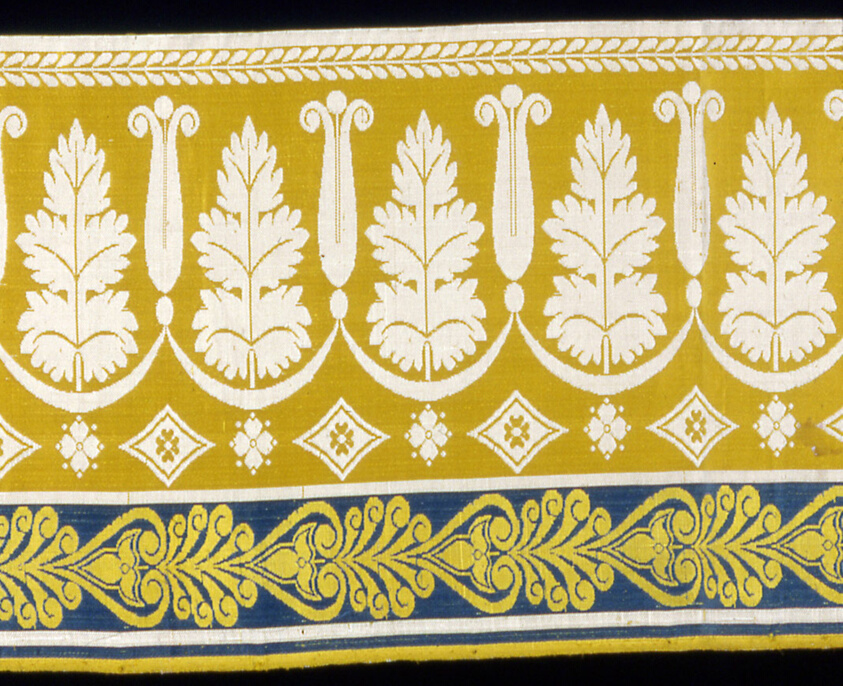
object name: Textile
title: Border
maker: France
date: 1805/10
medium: Silk, warp-float faced 7:1 satin weave with plain interlacings of secondary binding warps, patterning wefts and self-patterning ground wefts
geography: France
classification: textile; weaving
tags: foliage, flowers